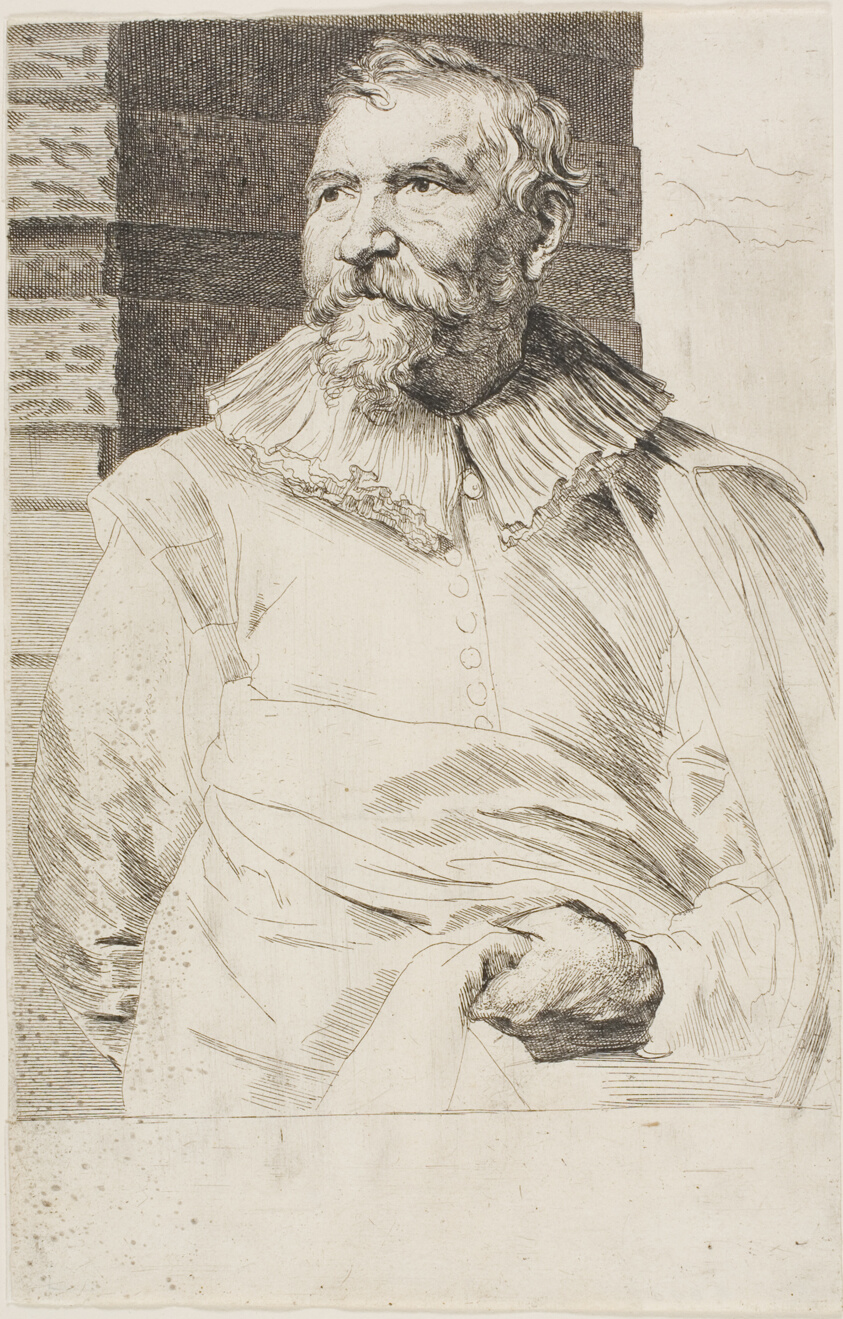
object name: Print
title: Adam van Noort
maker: Anthony van Dyck (Flemish, 1599-1641)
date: 1630/33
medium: Etching and engraving in black on ivory laid paper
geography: Flanders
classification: etching; print; prints and drawing